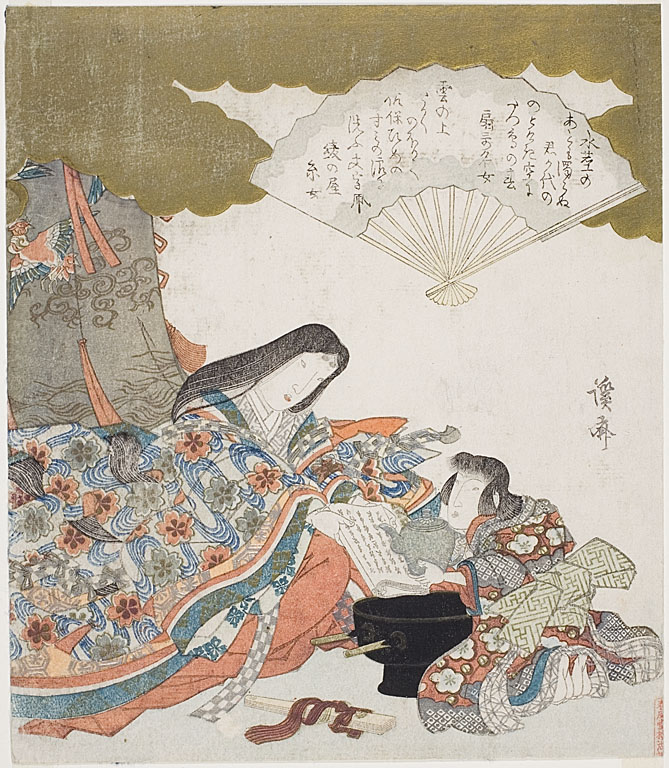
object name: Print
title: Ono no Komachi with her Assistant, Washing a Book of Poetry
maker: Keisai Eisen (Japanese, 1790–1848)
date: 1825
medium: Color woodblock print; surimono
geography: Japan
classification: woodblock print; print; asian art